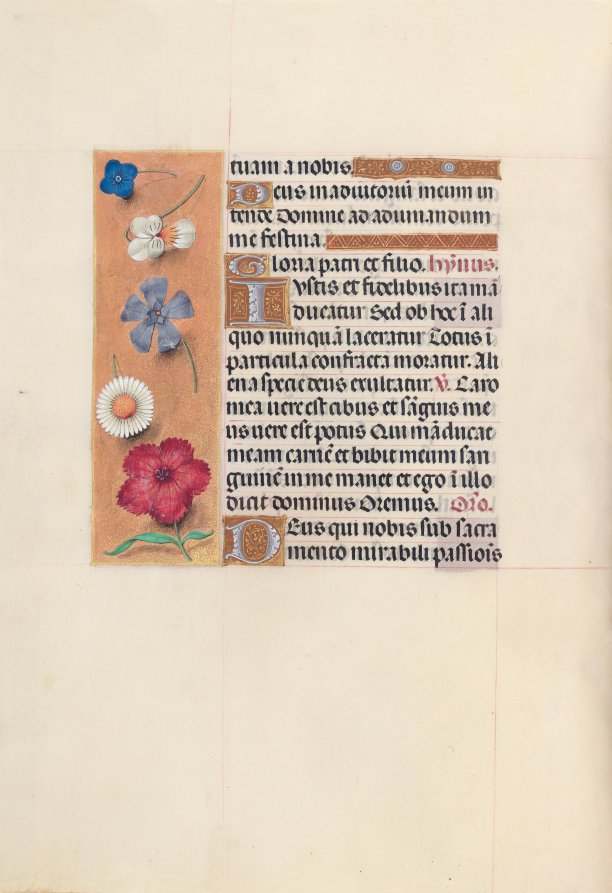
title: Hours of Queen Isabella the Catholic, Queen of Spain: Fol. 48v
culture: Flanders, Ghent and Bruges, late 15th century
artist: Master of the First Prayerbook of Maximillian (Flemish, c. 1444–1519)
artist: and Associates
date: c. 1500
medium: ink, tempera, and gold on vellum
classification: Bound Volume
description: This manuscript was illuminated by a circle of at least five highly organized manuscript painters active in the Flemish cities of Ghent and Bruges. The principal illuminator was Alexander Bening, who painted the majority of the book's miniatures. Manuscripts produced by this circle of artists are renowned for the decoration of their borders, which typically feature a rich variety of realistically-painted flowers, birds, and butterflies. This prayer book, called a book of hours, was intended not for a cleric, but for the private devotions of a lay person-in this case, Isabella the Catholic, Queen of Spain (1451-1504). Isabella's coat of arms embellishes the book's frontispiece. It is unlikely that the book was commissioned by the Queen herself; rather, she probably received it as a diplomatic gift from someone courting her patronage, perhaps Cardinal Francisco Jimenez de Cisneros. A Franciscan friar, Jimenez was dependent upon Isabella for his advancement, first to the post of Queen's confessor in 1492, and then to Archbishop of Toledo in 1495.